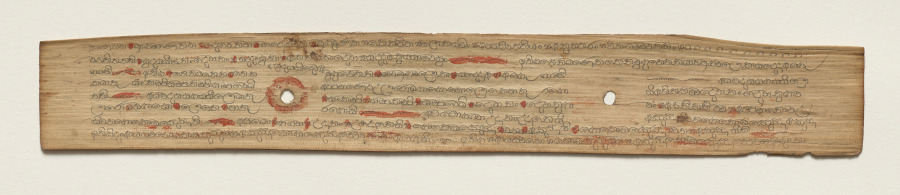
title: Leaf from a Buddhist Manuscript (verso)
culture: Sri Lanka, Singhalese, Late 17th century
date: c. 1700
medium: fiber paper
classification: Manuscript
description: Palm leaf material is still used for manuscripts in Sri Lanka. The palm leaves are prepared first by boiling them, drying them in the sun, and then rubbing them with oils. Scribes then use a metal stylus to incise the text. Then charcoal powder is wiped across the pages, filling in only the inscribed lines.